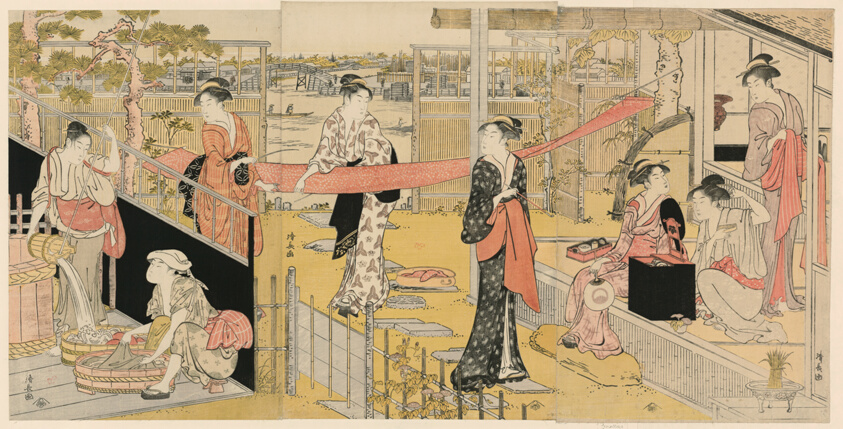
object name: Print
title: Women Washing Clothes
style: Japanese (culture or style)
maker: Torii Kiyonaga (Japanese, 1752-1815)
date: c. 1788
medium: Color woodblock print; oban, triptych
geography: Japan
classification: woodblock print; print; asian art